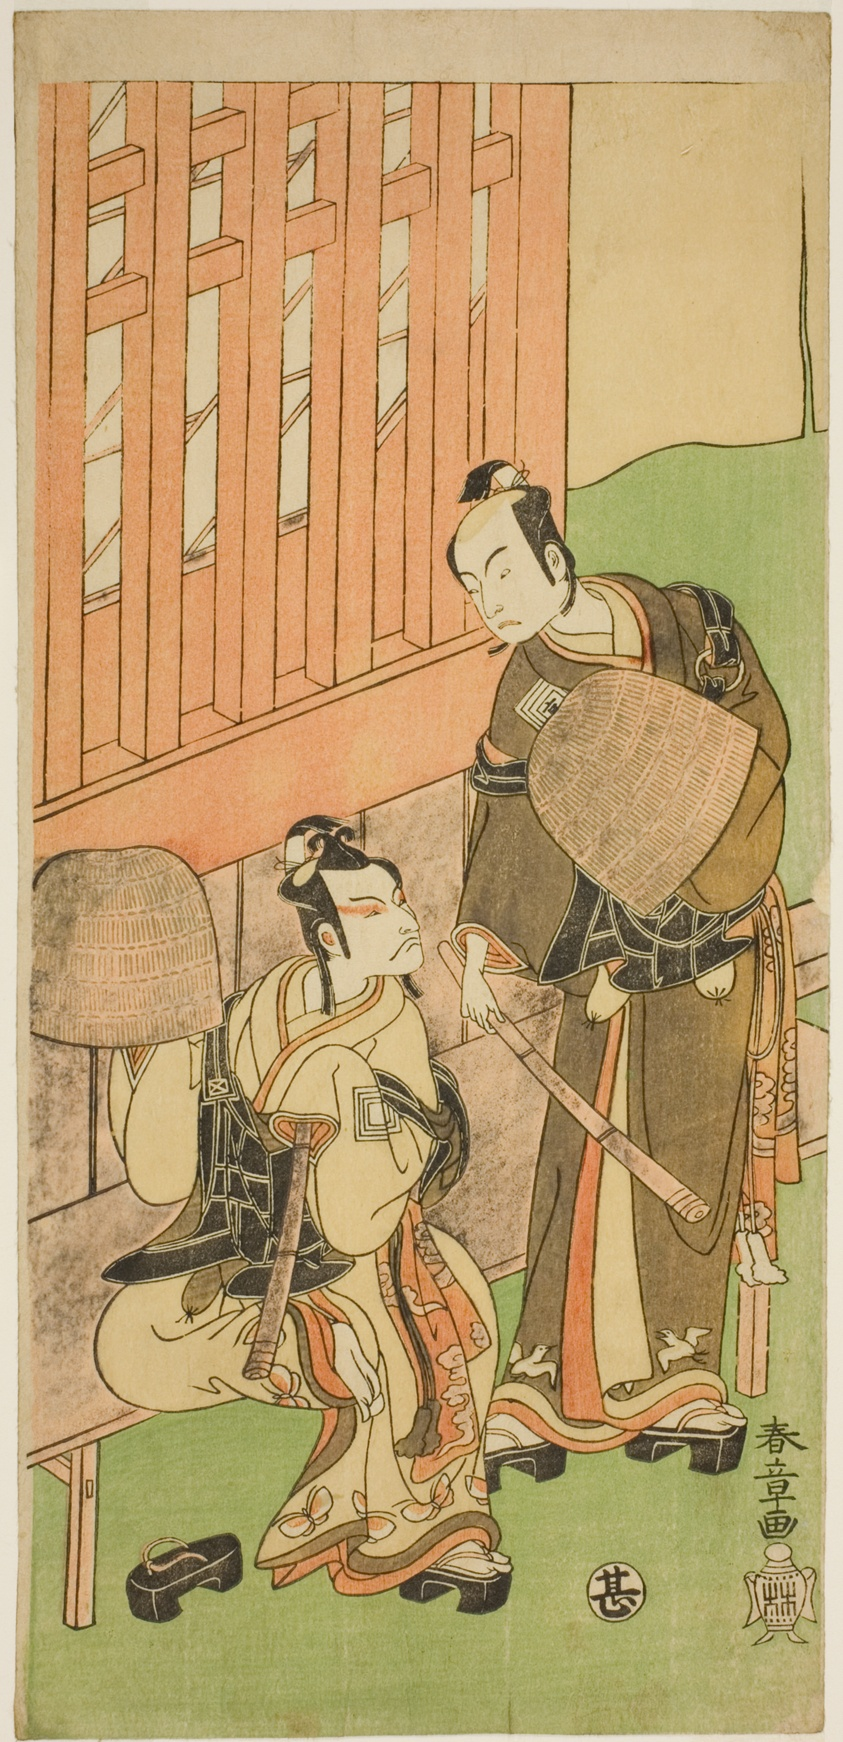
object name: Print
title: The Actors Ichikawa Komazo II as Soga no Juro Sukenari (right), and Ichikawa Danjuro V as Soga no Goro Tokimune (left), in Komuso Attires, in the Play Sakaicho Soga Nendaiki, Performed at the Nakamura Theater in the First Month, 1771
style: Japanese (culture or style)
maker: Katsukawa Shunsho 勝川 春章; Japanese, 1726-1792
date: c. 1771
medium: Color woodblock print; hosoban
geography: Japan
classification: woodblock print; print; asian art